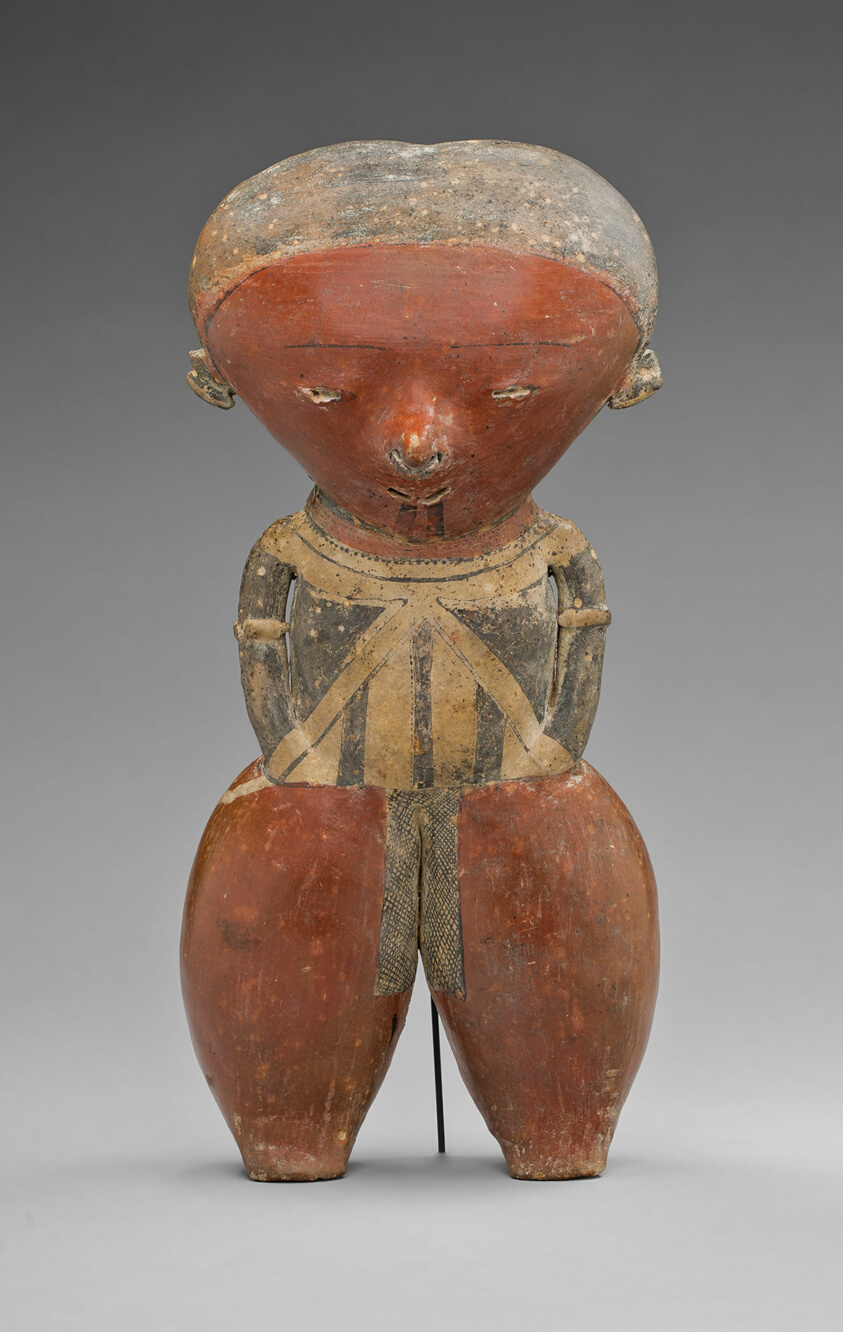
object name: Sculpture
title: Polychrome Standing Figure with Exaggerated Head and Hips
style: nayarit, Arts of the Americas, mesoamerican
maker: Nayarit, Chinesco style; Nayarit, Mexico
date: 1–300 CE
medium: Ceramic and pigment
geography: Nayarit state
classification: statuette; art of the americas; sculpture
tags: people